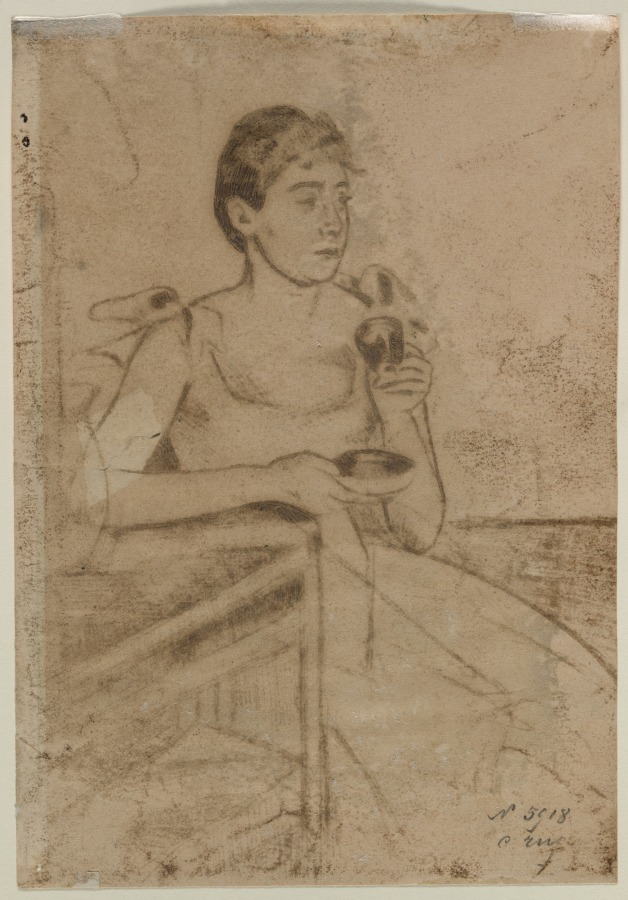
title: After-Dinner Coffee (recto); After-Dinner Coffee (verso)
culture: America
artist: Mary Cassatt (American, 1844–1926)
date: c. 1889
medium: graphite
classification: Drawing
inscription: inscribed in graphite, lower right: "M. C."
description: Cassatt exhibited prints for the first time in 1880 at the fifth Impressionist exhibition. As the decade progressed, she continued to show her graphic work alongside pastels and paintings. In the spring of 1890, at the Deuxième Exposition de Peintres-Graveurs, she showed a group of drypoints, remarkable in their delicacy and precision, as well as a group of prints made with a combination of aquatint and softground etching that appeared quickly drawn and spontaneous. After-Dinner Coffee is a study for a softground etching with aquatint.